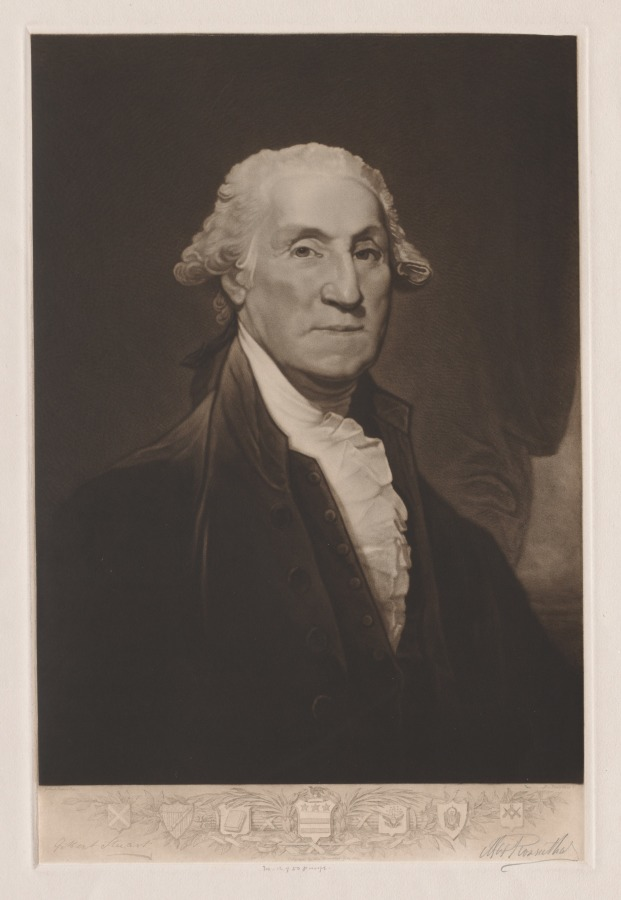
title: George Washington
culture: America, early 20th Century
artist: Max Rosenthal (American, 1833–1918)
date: 1904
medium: mezzotint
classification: Print